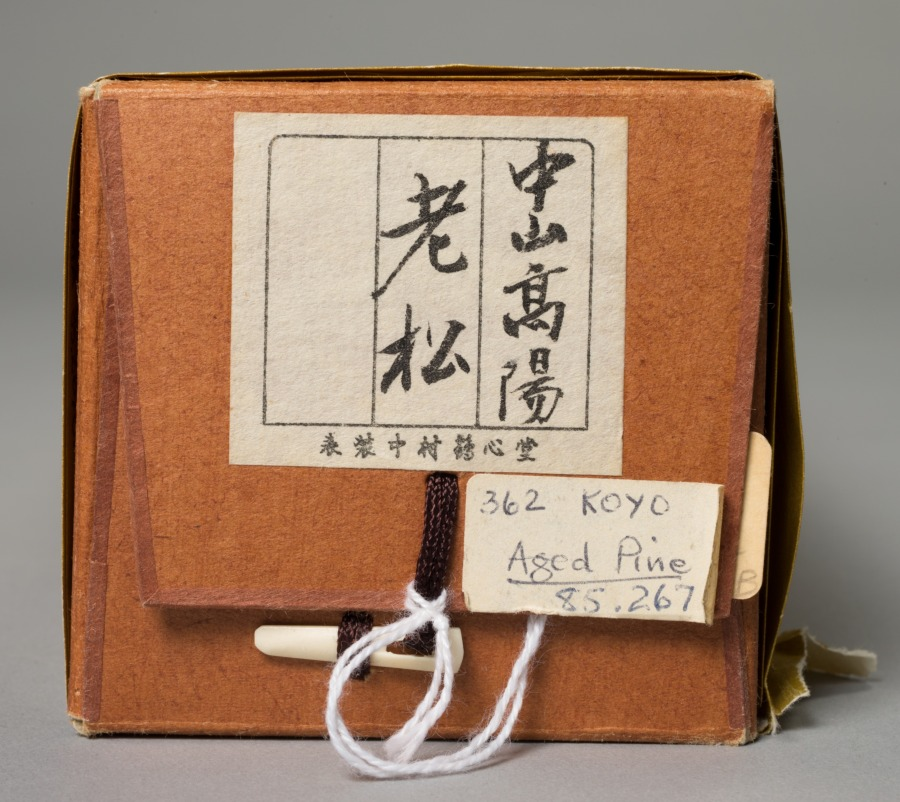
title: Aged Pine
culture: Japan, Edo period (1615–1868)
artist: Nakayama Kōyō (Japanese, 1717–1780)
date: 1717–80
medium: hanging scroll; ink on paper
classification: Painting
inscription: Artist's inscription and seal, lower right.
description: The ancient pine is an admired subject in Asian painting and symbolizes the desirable human qualities of wisdom and solid moral character.